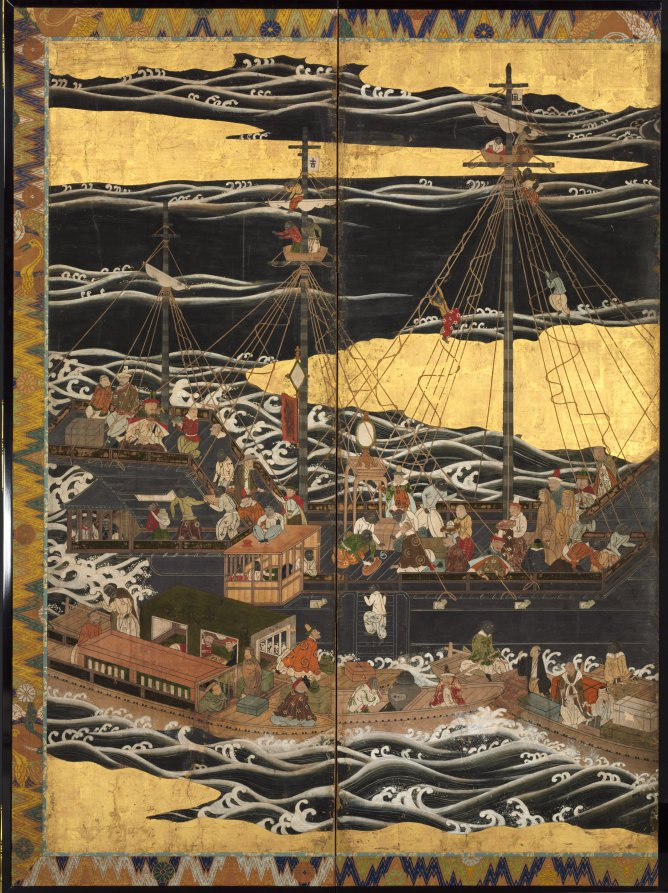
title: Arrival of the "Southern Barbarians"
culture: Japan, Momoyama period (1573–1615)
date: c. 1600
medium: One of a pair of six-panel folding screens; ink, color, and gold on paper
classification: Painting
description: This screen and its corresponding screen show Portuguese merchants arriving in Japan, having crossed the oceans in their large ship with a multinational crew. The Portuguese were known in Japan as the “Southern Barbarians” because they arrived from the south and their customs and manners were unfamiliar to the Japanese, who had not encountered anyone from Europe until their first appearance in 1543. In 1639, the Portuguese were forced out of Japan, mainly owing to internal difficulties caused by their Catholic missionaries, but they were a major conduit for both objects and ideas from Europe for nearly 100 years.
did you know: Europeans were called "Southern Barbarians" because their ships arrived in Japan from the south.